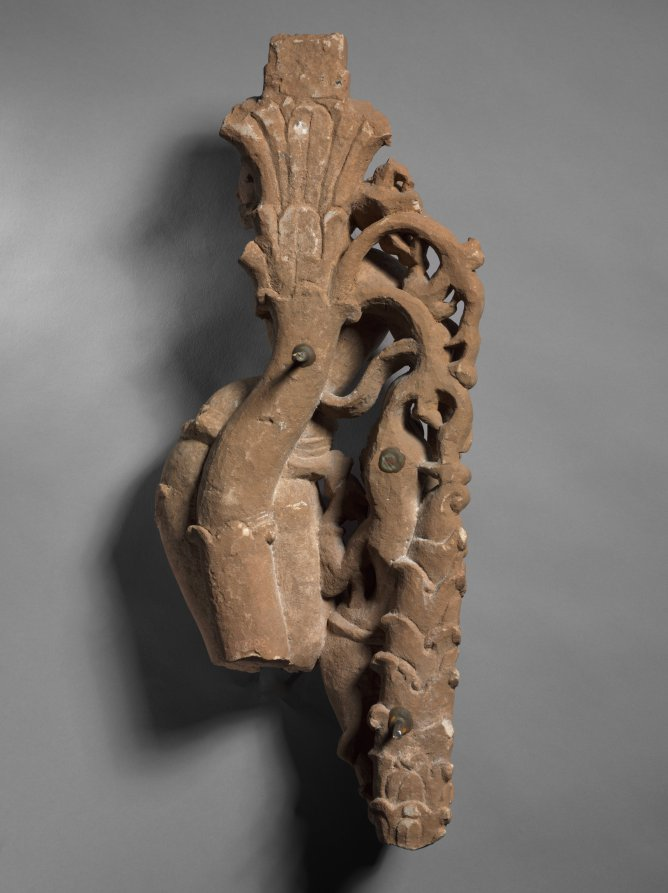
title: Female Tree Deity with Attendant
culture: Northwestern India, Rajasthan, Sikar, Harshagiri, 10th century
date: c. 973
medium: sandstone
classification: Sculpture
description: Memories of the nature divinities so important on the exterior of ancient Buddhist sites persist in female figures such as this on Hindu temples of the medieval period. Her form personifies fecundity, and the mango tree with which she is integrated bursts into the fruits that dangle down the side of the sculpture. Her attendant gazes into a mirror. This sculpture exemplifies the stylistic characteristics of the 900s, with the exaggerated thrust of her hip, and dense, crisply rendered areas of jewelry offset by smooth planes of flesh. Facial features are articulated with linear clarity and sharp outlines. These idealized female figures convey the notion of auspicious abundance and prosperity in the created world, which are benefits of worship and support of the temple.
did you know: There is a small monkey perched by the tree deity's shoulder.